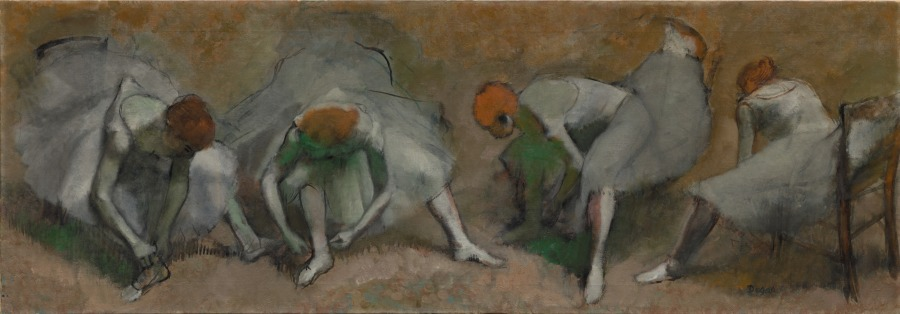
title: Frieze of Dancers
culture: France, 19th century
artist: Edgar Degas (French, 1834–1917)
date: c. 1895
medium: oil on fabric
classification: Painting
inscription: Signed in lower right: Degas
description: This painting may depict a single dancer seen from four different viewpoints. The young woman is placed in an undefined setting, surrounded by mere wisps of color, applied so spontaneously that the paint ran and dripped. Degas even added the circles in the foreground with his thumb. Such audacity, while acceptable in a small sketch, must have shocked the artist's contemporaries when presented on a six-foot canvas. Equally radical is the idea of combining multiple views of a single figure. Degas's unusual presentation may have been inspired by the photographs of Eadweard Muybridge (1830-1904)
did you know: The ballet is a subject Degas returned to again and again over the course of his career. Rather than public performances, he often depicted dancers behind the curtain, practicing, waiting, or, as in this painting, lacing up their shoes.